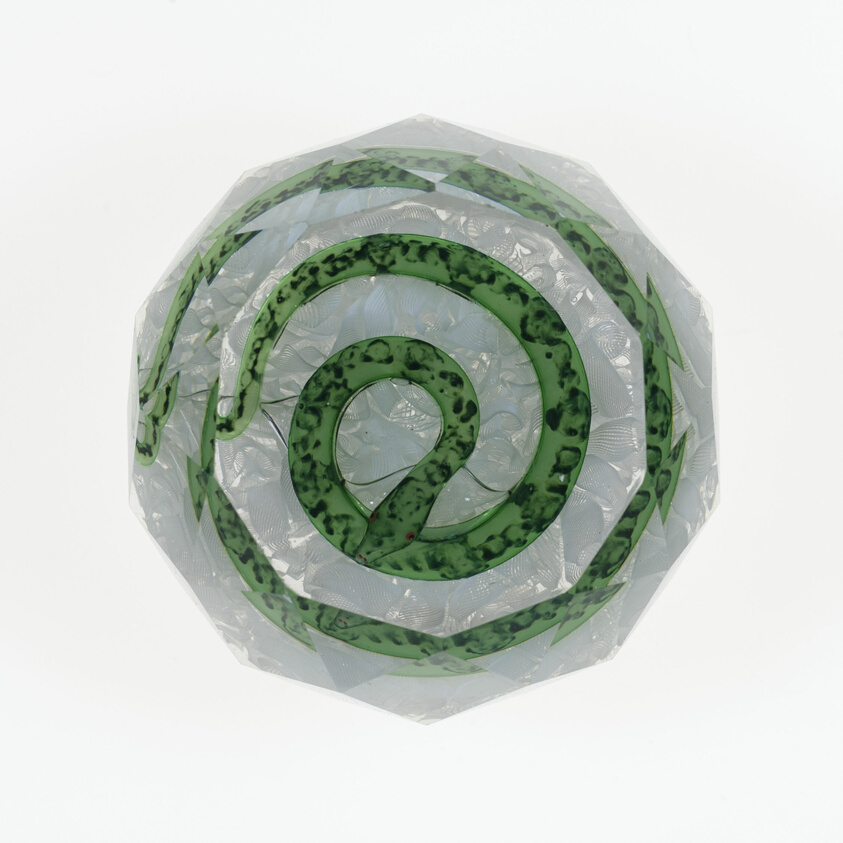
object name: Glass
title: Paperweight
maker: Saint-Louis Glassworks (Cristalleries de Saint-Louis); Lorraine, France, founded 1586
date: c. 1845–60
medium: Glass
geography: Saint-Louis-lès-Bitche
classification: paperweight; glass